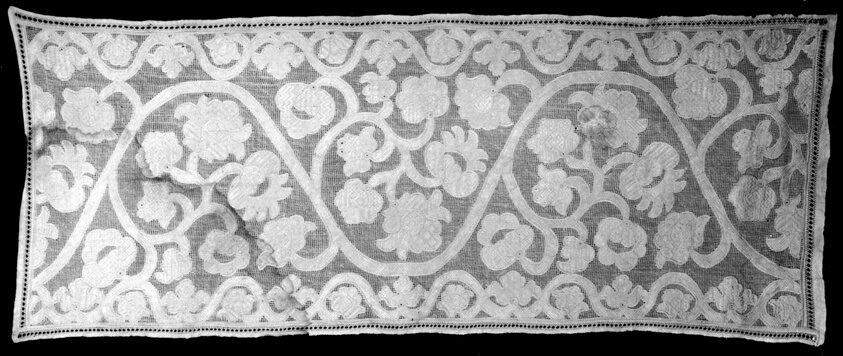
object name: Textile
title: Portion of Altar Frontal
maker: Russia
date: 19th century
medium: Linen, plain weave; embroidered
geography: Russia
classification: textile; needlework (visual works); liturgical; altar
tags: altar